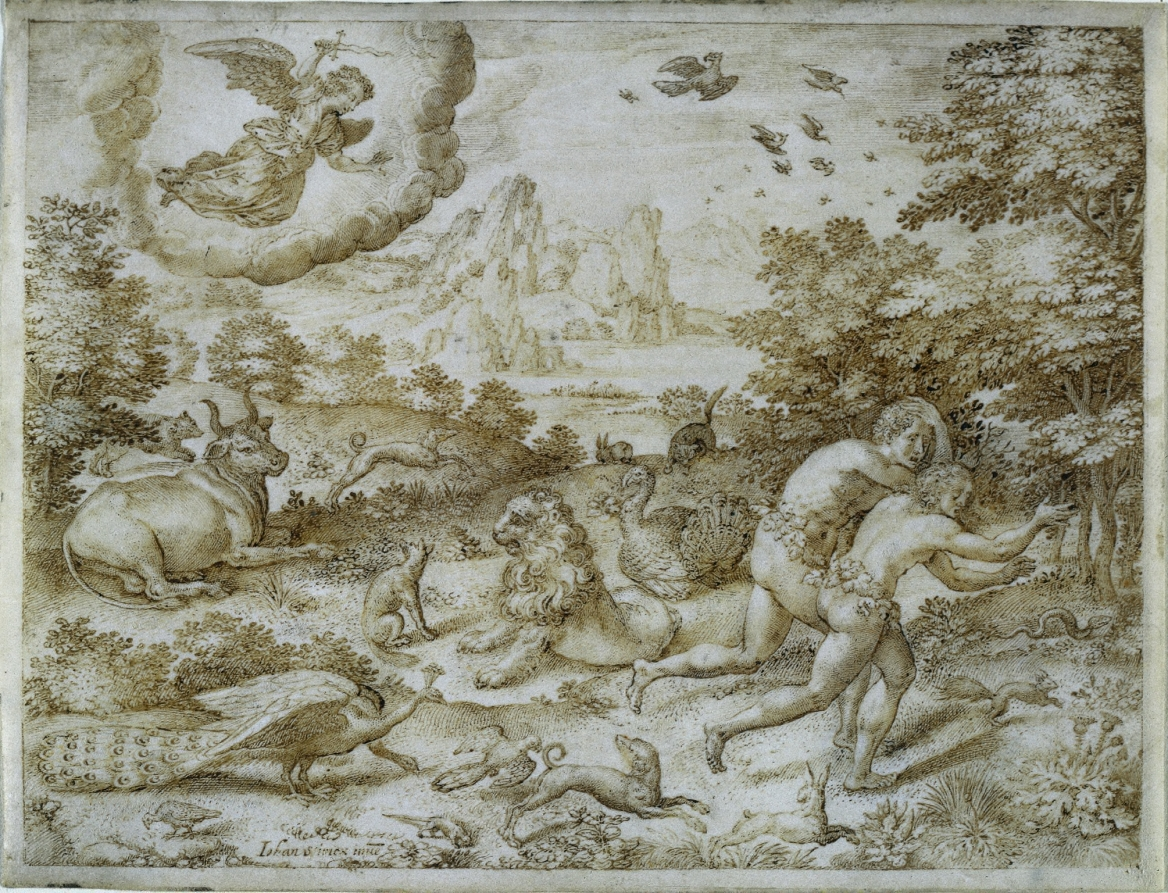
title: The Expulsion from Paradise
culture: Flanders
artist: Jan Wierix (Flemish, c. 1549–after 1615)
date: c. 1606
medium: Pen and brown ink on parchment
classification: Drawing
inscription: signed, lower left, in brown ink: Iohan wiricx inue [abbreviation line over "u" and "e"]; verso, lower left, in graphite: No ["o" with double underlines]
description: Originally this exquisite sheet belonged to a series of 21 drawings by the Antwerp artist Jan Wierix illustrating the creation and early history of man as recounted in Genesis. In this scene, an angel casts Adam and Eve out of paradise for their transgressions. Precious in its delicate pen strokes and careful detail, the drawing describes Eden as a microcosm populated by an array of animals whose tranquility is in the midst of being interrupted by human actions. Pen and ink drawings on vellum such as this were prized by collectors, who valued them as miniature paintings to be displayed in albums and sometimes framed on the wall.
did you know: This artist's version of the Garden of Eden includes a turkey, a bird that was unknown in Europe until the 16th century, when it was imported from the Americas.